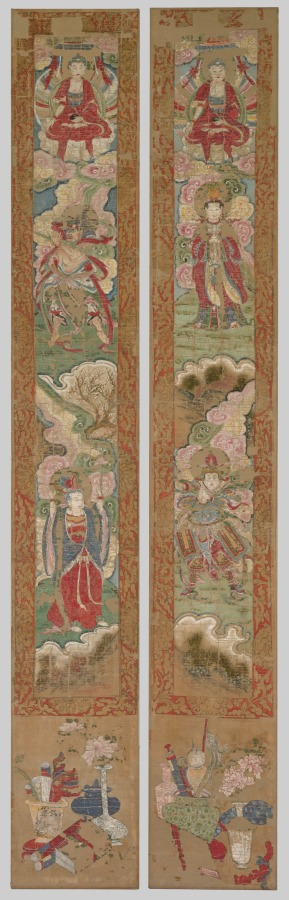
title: Buddhist Panel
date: 1600s–1700s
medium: Pair of hanging scrolls; ink and color on paper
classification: Painting